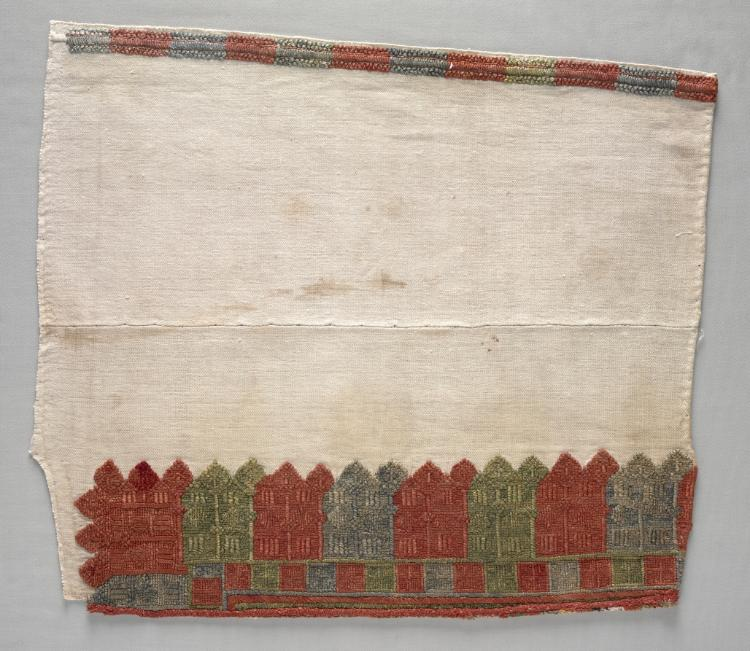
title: Sleeve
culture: Greece, Dodecanese Islands, 18th century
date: 1700s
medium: embroidery: silk on cotton tabby ground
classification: Embroidery